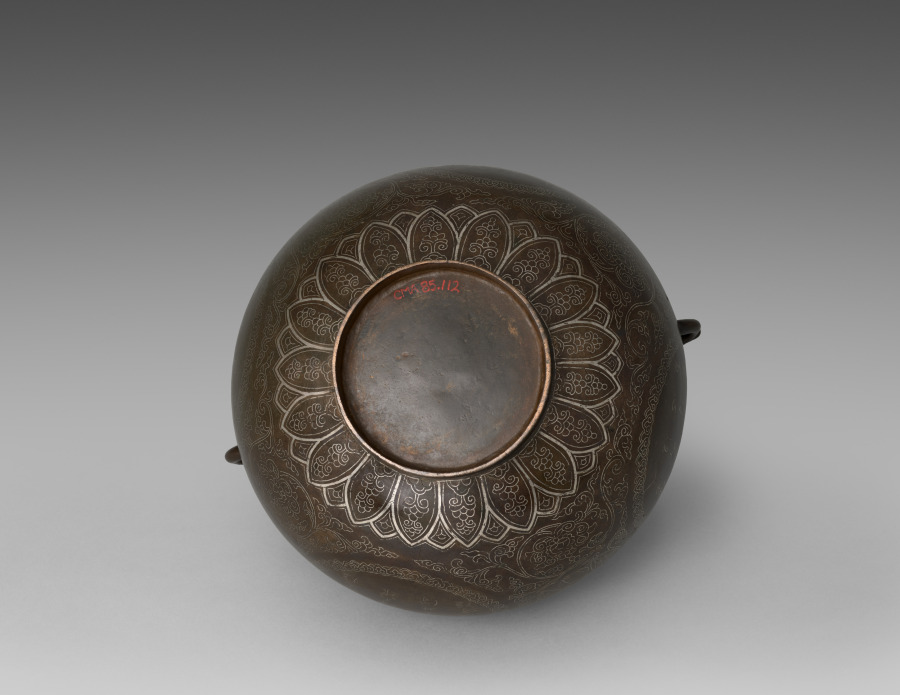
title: Basin with Inscribed Figures and Calligraphy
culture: Korea, Goryeo dynasty (918–1392)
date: 1100s–1200s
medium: bronze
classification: Metalwork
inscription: Each of the three roundels contain five-character, four-line poems with Buddhist messages.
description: This bronze basin may have been used for containing purified water. What makes this work charming is its intricate decoration done in silver inlay: the five-character, four-line poems interspersed among images of a child. The poems, which evoke the concept of nonattachment and nonduality, were written by Buddhist monks.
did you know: A child, one of the main decorative elements for this basin, is possibly a young Buddhist pilgrim named Sudhana, who took a long spiritual journey to search for enlightenment.